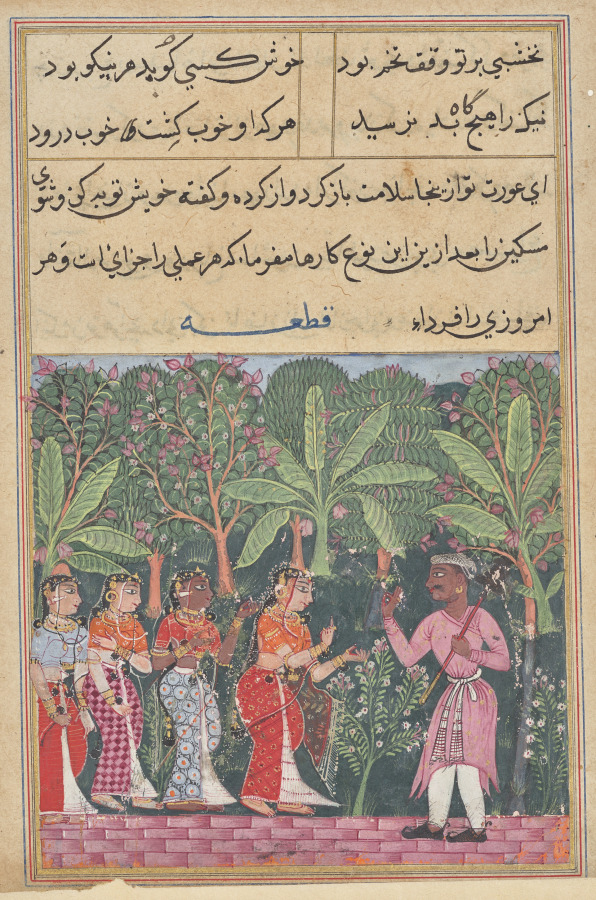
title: The merchant’s daughter meets the gardener, from a Tuti-nama (Tales of a Parrot): Twelfth Night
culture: Mughal India, court of Akbar (reigned 1556–1605)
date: c. 1560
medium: gum tempera, ink, and gold on paper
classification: Painting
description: Persian books are read from right to left. One artist illustrated the three scenes from one of the 52 stories of the Tuti-nama, retaining many pre-Mughal traits. Trees stand out as bold shapes, and figures are arranged in a single register, or horizontal spatial band, and have angular and expressive gestures. The figures of the women are closely related to pre-Mughal types, shown always in profile and wearing garments that stand stiffly and sharply out before them. In leaves from the Tuti-nama, Mughal artists adapted the colors, compositions, and figure types of the earlier style.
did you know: In the time since their first meeting, the gardener has become an ascetic.